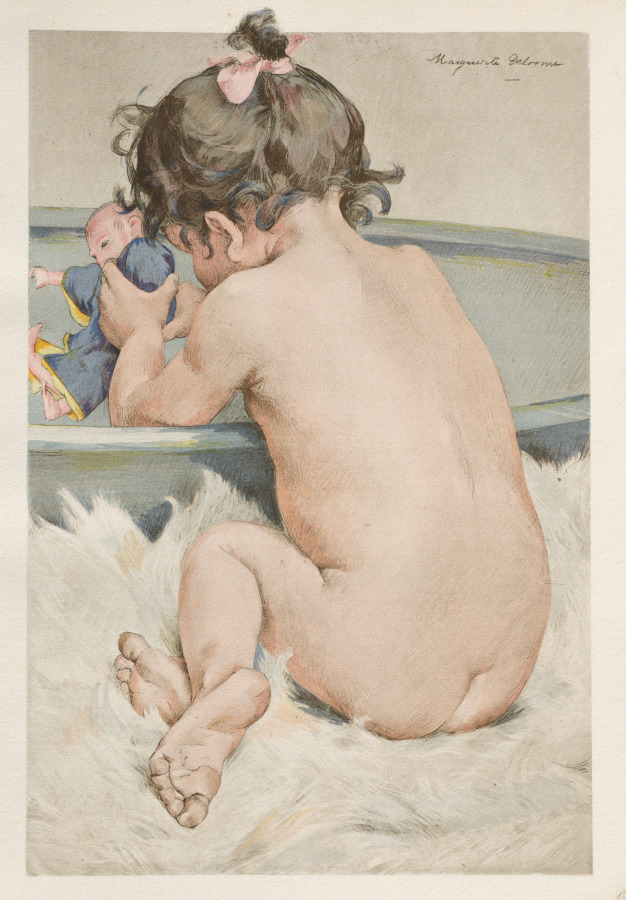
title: La Poupée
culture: France, 19th century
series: L'Estampe Moderne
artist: Marguerite Delorme (French, 1876–1946)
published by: Imprimerie Champenois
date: 1899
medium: Color lithograph from bound volume containing 50 lithographs, each with a tissue paper guard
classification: Bound Volume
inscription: In plate, upper right corner of image: Marguerite Delorme; lower right corner of sheet: blindstamp of L'Estampe Moderne (Lugt 2790)